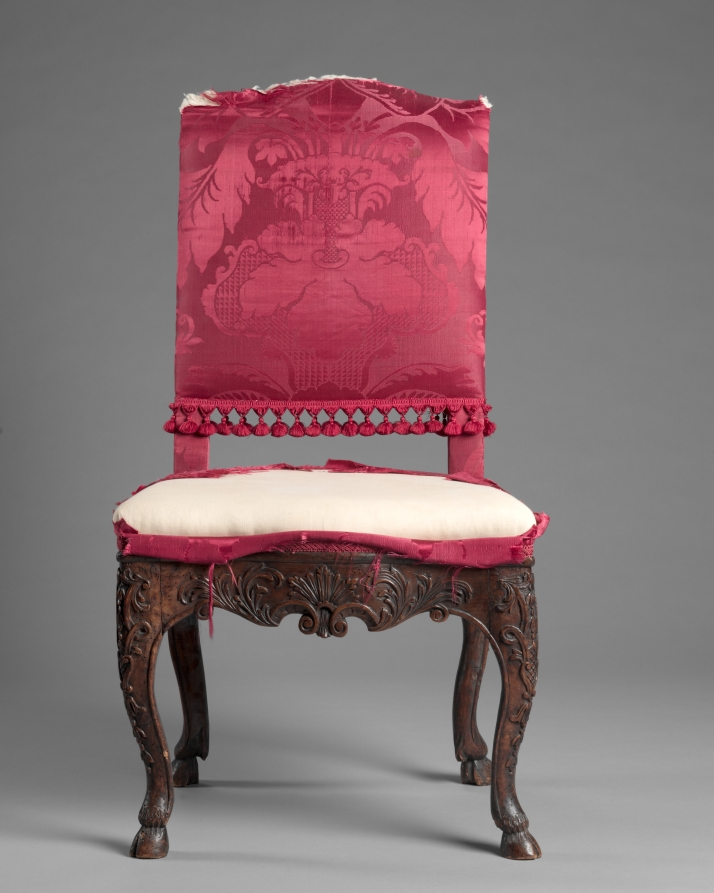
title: Side Chair (1 of 2)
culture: Germany, Belgium, or the Netherlands, early 18th century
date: early 1700s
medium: walnut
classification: Furniture and woodwork